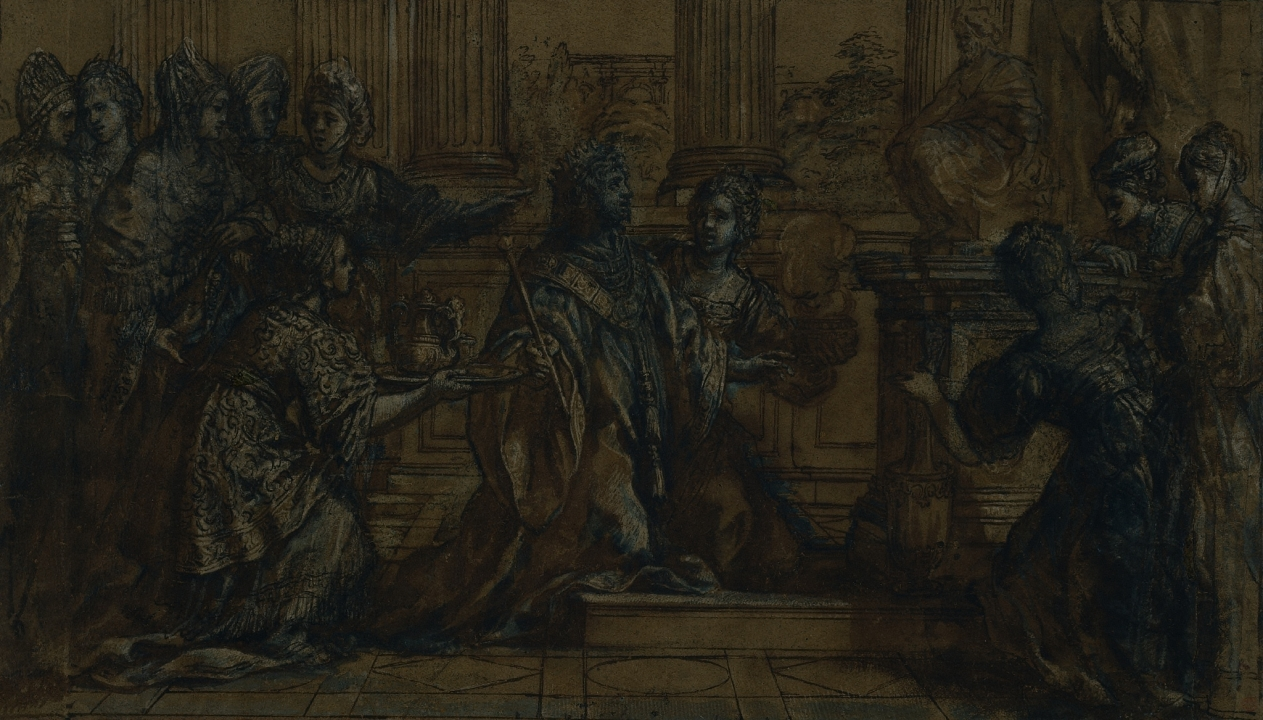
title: The Idolatry of Solomon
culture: Italy, 17th century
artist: Pietro da Cortona (Italian, 1596–1669)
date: 1622–23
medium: Pen and brown ink, point of brush and black ink, brush and brown wash, and white and blue gouache, framing lines in brown ink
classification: Drawing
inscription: verso of secondary support, upper center, in graphite: 44; center, in blue ballpoint: Maria Elvira Celia Mendez de Bernasconi [underlined] / 1977; center, in graphite: Paolo Farinato; center, in graphite: [illegible]; lower left, in graphite: [illegible, partially masked]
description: Pietro da Cortona was one of the most successful and active fresco painters in Rome in the mid-1600s. This drawing is a preparatory sheet—highly worked-up with many different mediums—for one of the artist's six frescoes portraying the story of Solomon commissioned by the Roman nobleman Asdrubale Mattei (1556-1638) for the gallery of his Palazzo Mattei di Giove. Reflecting the artist's as well as his patron's interest in classical antiquity, Cortona combined a classical relief-like composition with specific references to Roman objects and architectural elements in the composition. The subject represents a foolish episode from Solomon's life, when he was lured into the worship of idols by the "foreign" women with whom he kept company.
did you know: Pietro da Cortona completed this drawing and the six frescoes related to it for a prominent patron and palazzo in Rome when he was just 27 years old.